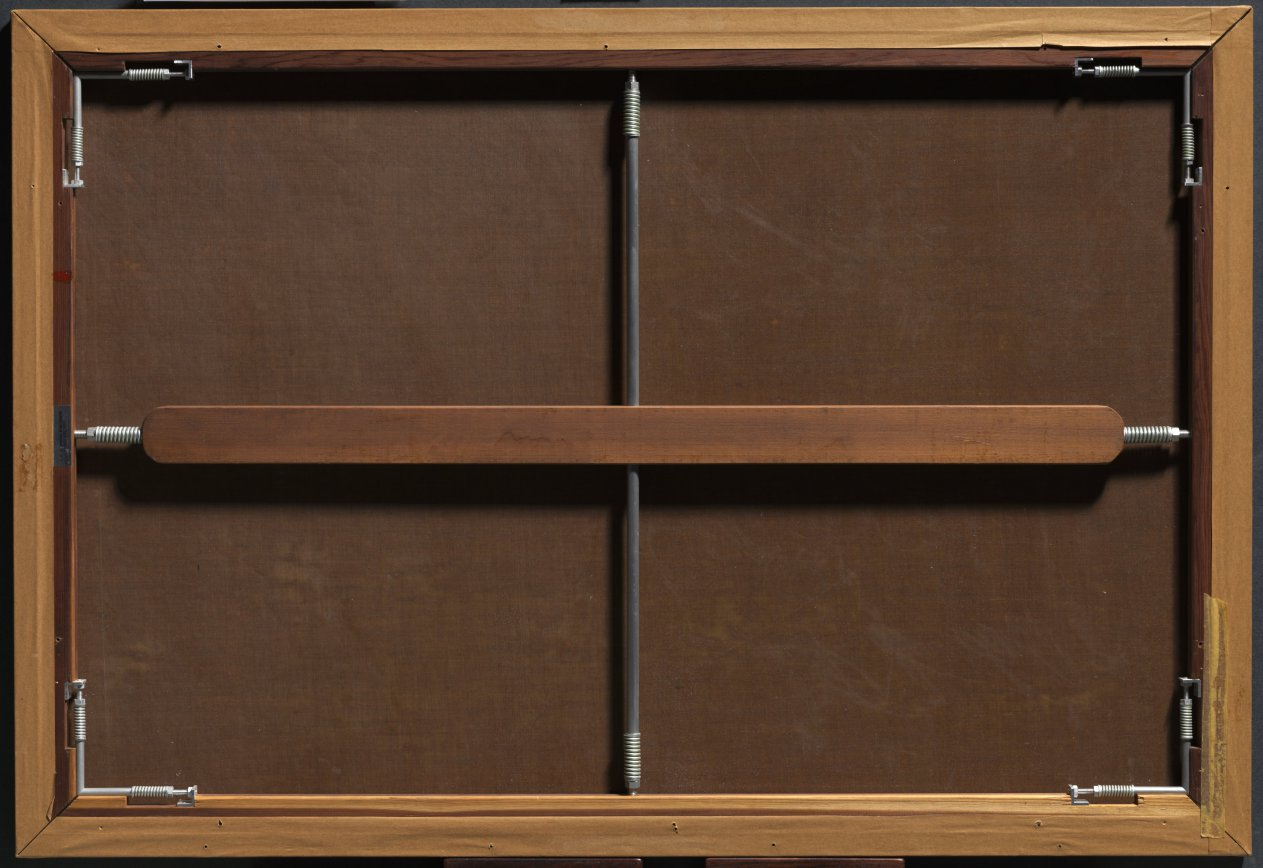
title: Landscape Near Paris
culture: France, 19th century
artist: attributed to Georges Michel (French, 1763–1843)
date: c. 1840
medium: oil on fabric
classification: Painting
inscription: Formerly signed and dated lower left (according to Minneapolis Institute of Arts, see note 2)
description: The location of this scene, probably near Paris, has not been identified with certainty. Unlike most painters of this time, Michel never traveled to Italy and focused only on depicting locations in France. Michel was always interested in Dutch art, however, and was nicknamed the "French Ruisdael"-a reference to the 17th-century Dutch landscape painter Jacob van Ruisdael (1628-1682). After about 1808, Michel explored personal interpretations of landscape, focusing on light, sky, and space. The brooding, vaguely threatening atmosphere in this painting embodies the Romantic notion that human beings are insignificant relative to the larger forces of nature.